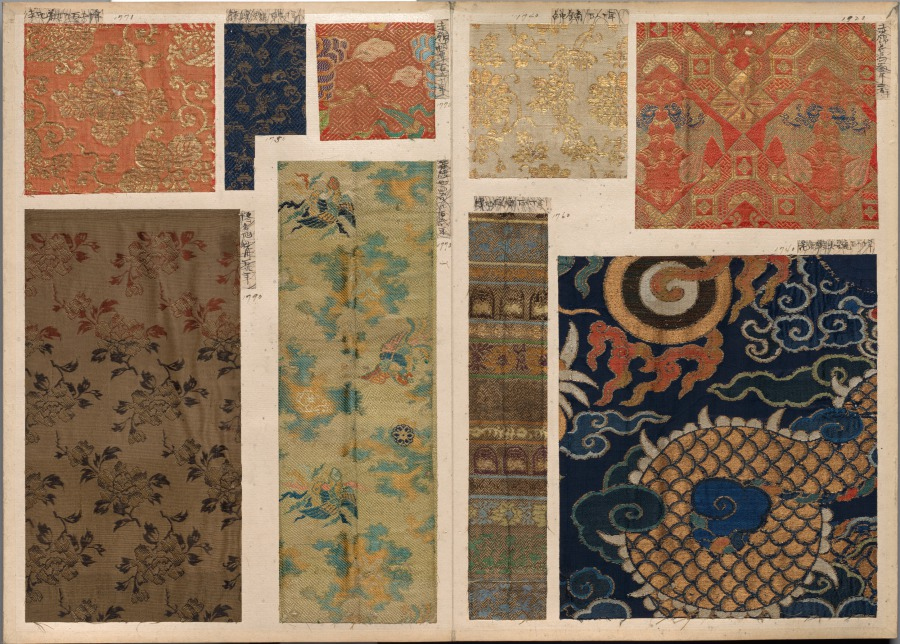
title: Album of Textile Samples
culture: Japan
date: 1790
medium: silk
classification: Textile